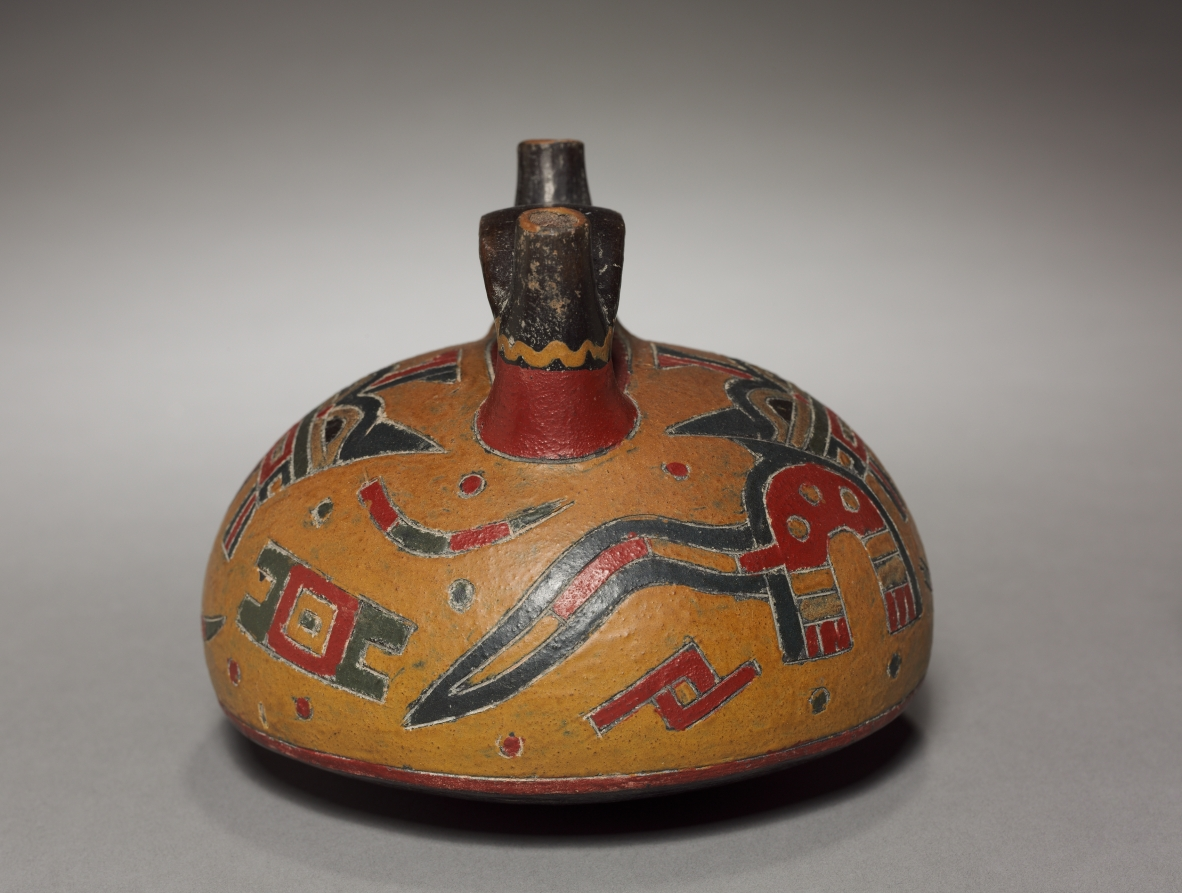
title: Vessel with Feline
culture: Peru, South Coast, Paracas (Cavernas) style (700 BCE–1 CE)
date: 700 BCE–1 CE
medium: earthenware, resin-based paint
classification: Ceramic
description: Little is known of the meaning of the beautifully abstracted felines so often incised on Paracas ceramics. The designs achieve much of their complexity through color applied as resin-based paint after the vessel was fired in a smoky atmosphere that blackened its surface. Two spouts joined by a bridge appear on many fine South Coast ceramics. The form probably had meaning, now lost.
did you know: Small, wild, reclusive felines, pampas cats live on the margins of agricultural fields, where they prey on rodents and other pests that are a farmer’s bane